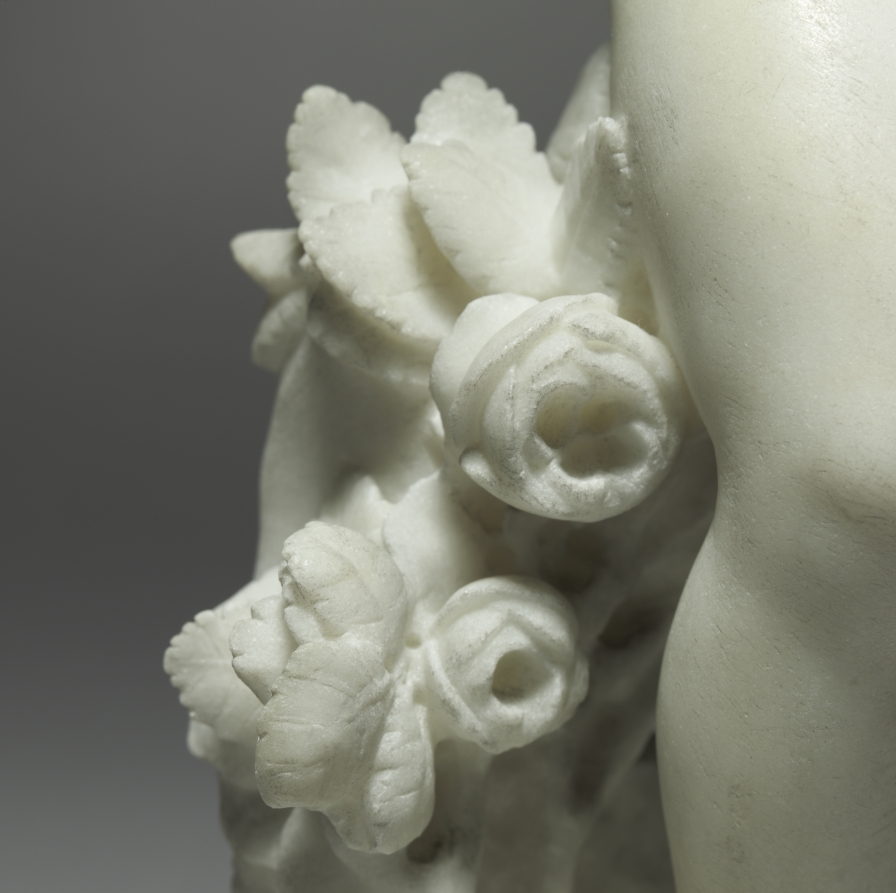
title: Faithful Love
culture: France, 19th century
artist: after Augustin Pajou (French, 1730–1809)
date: 1800s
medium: marble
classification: Sculpture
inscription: signature behind stump with roses: Pajou f(ecit) 1787.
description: These statuettes represent the opposing spectrums of love—fickle and faithful—both portrayed by Cupid. Fickle Love absent-mindedly plays with a butterfly, a symbol of the fleeting moment. Conversely, Faithful Love is accompanied by a dog, the ultimate loyal companion. These works were originally believed to be by the hand of Augustin Pajou, because the works are signed and he made nearly identical sculptures. However, due to the slightly clumsy execution and the awkward scale of the signatures, the museum now believes the statuettes were created by another artist after Pajou's design.